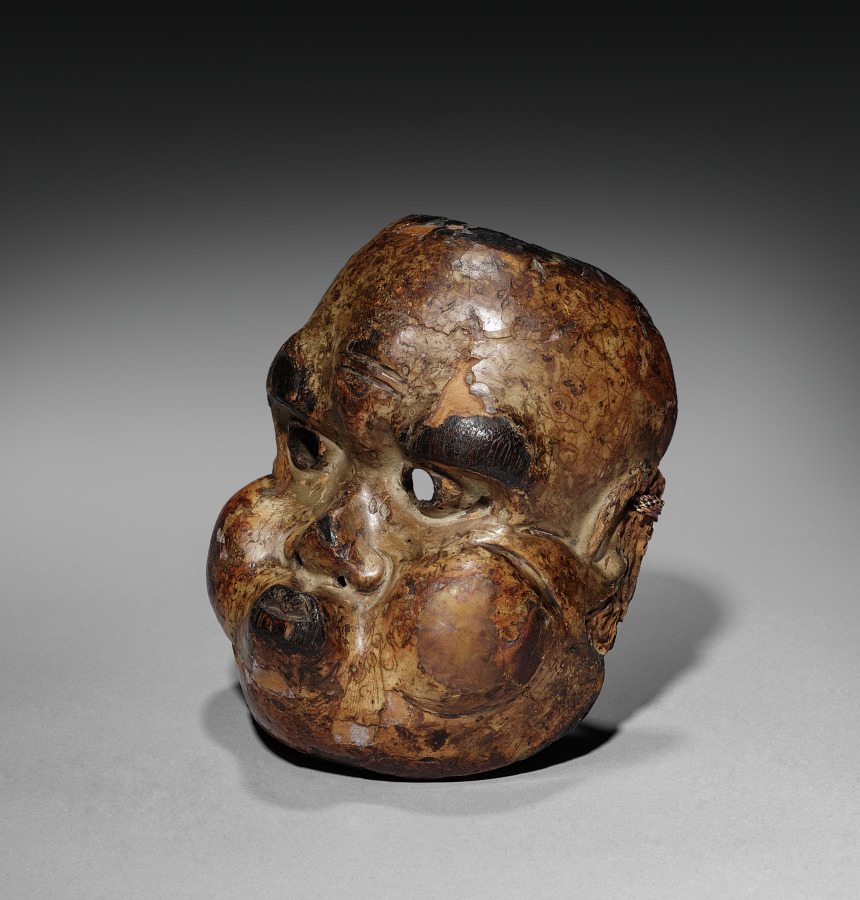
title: Kyogen Mask: Whistler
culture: Japan, Edo period (1615–1868)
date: 1600s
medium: wood with color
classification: Sculpture